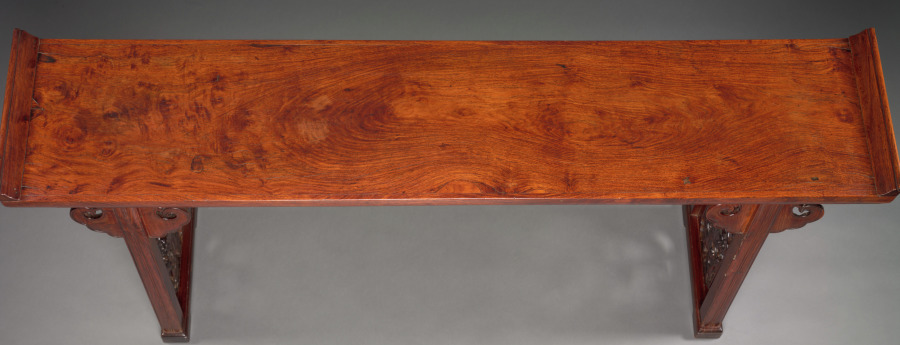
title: Side Table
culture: China, Ming dynasty (1368-1644) or Qing dynasty (1644-1911)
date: 1600s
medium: Rosewood (huanghuali)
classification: Furniture and woodwork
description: Long, rectangular tables were often placed against a wall to hold candlestands, flower vases, or incense burners. It was customary to hang ancestor portraits, images of religious figures, or seasonal paintings above the table that would convey auspicious wishes and blessings to the family. The high legs show stylized cloud-shaped spandrels. At each end of the table, between the recessed legs, are carved openwork panels with a lively dragon motif.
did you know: The table top is made of a single plank of wood.